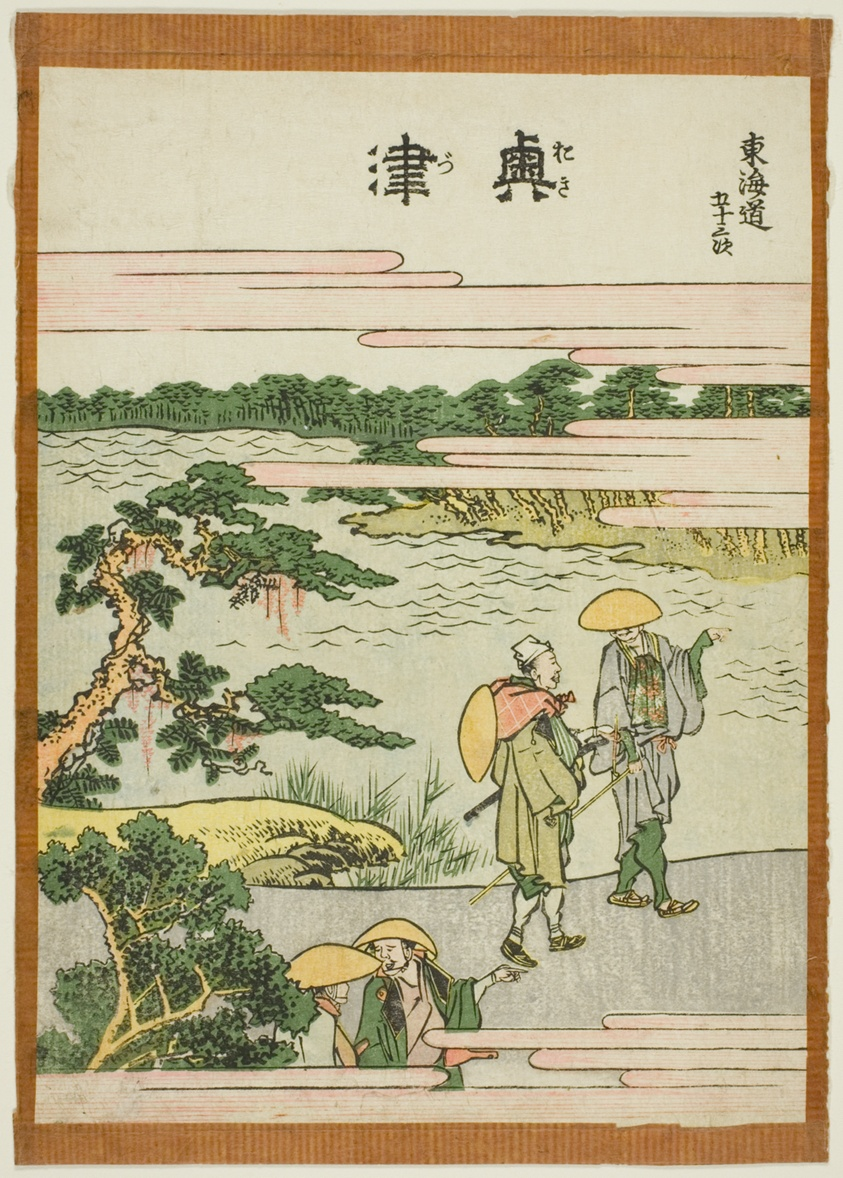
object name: Print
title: Okitsu, from the series "Fifty-three Stations of the Tokaido (Tokaido gojusan tsugi)"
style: Japanese (culture or style)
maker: Katsushika Hokusai 葛飾 北斎; Japanese, 1760-1849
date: c. 1806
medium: Color woodblock print; chuban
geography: Japan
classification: woodblock print; print; asian art